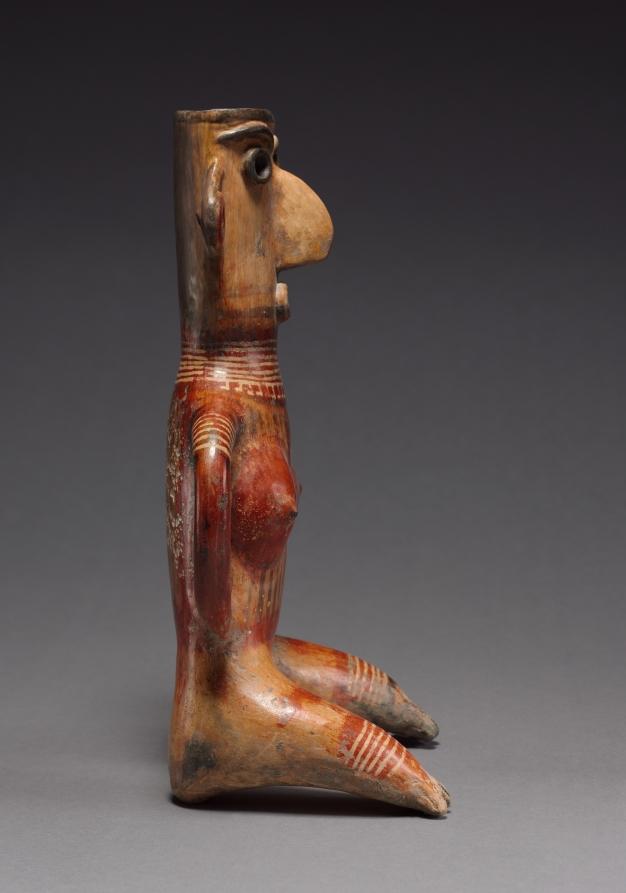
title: Seated Female Figure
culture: Mexico, Jalisco, Zacatecas style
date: 100 BCE–300 CE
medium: pottery with burnished, colored slips, resist patterning, and possibly post-fire painting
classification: Sculpture